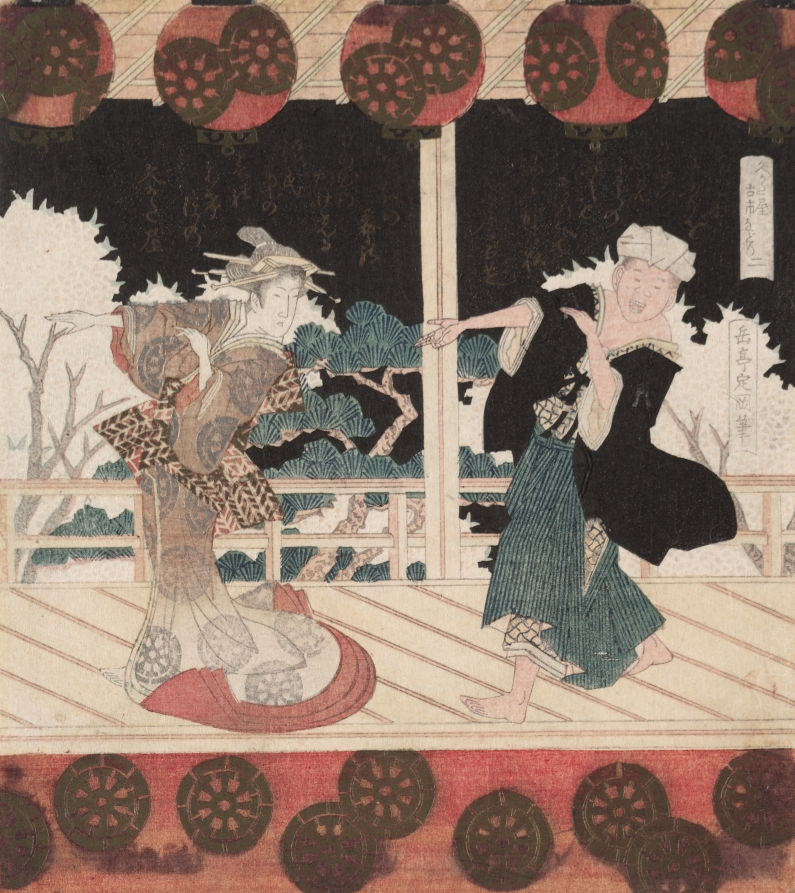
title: Furuichi Dance at the Hisagataya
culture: Japan, Edo period (1615–1868)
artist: Gakutei Harunobu (Japanese, 1786(?)–1868)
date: mid 1820s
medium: second of a pentaptych of woodblock prints; ink and color on paper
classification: Print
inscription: Signature: Gakutei Sadaoka hitsu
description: A surimono is a print in which an image is combined with poetry to celebrate a special event. This print shows the poet Hisagataya dancing with a troupe of geisha at a teahouse in the town of Furuichi near Ise.